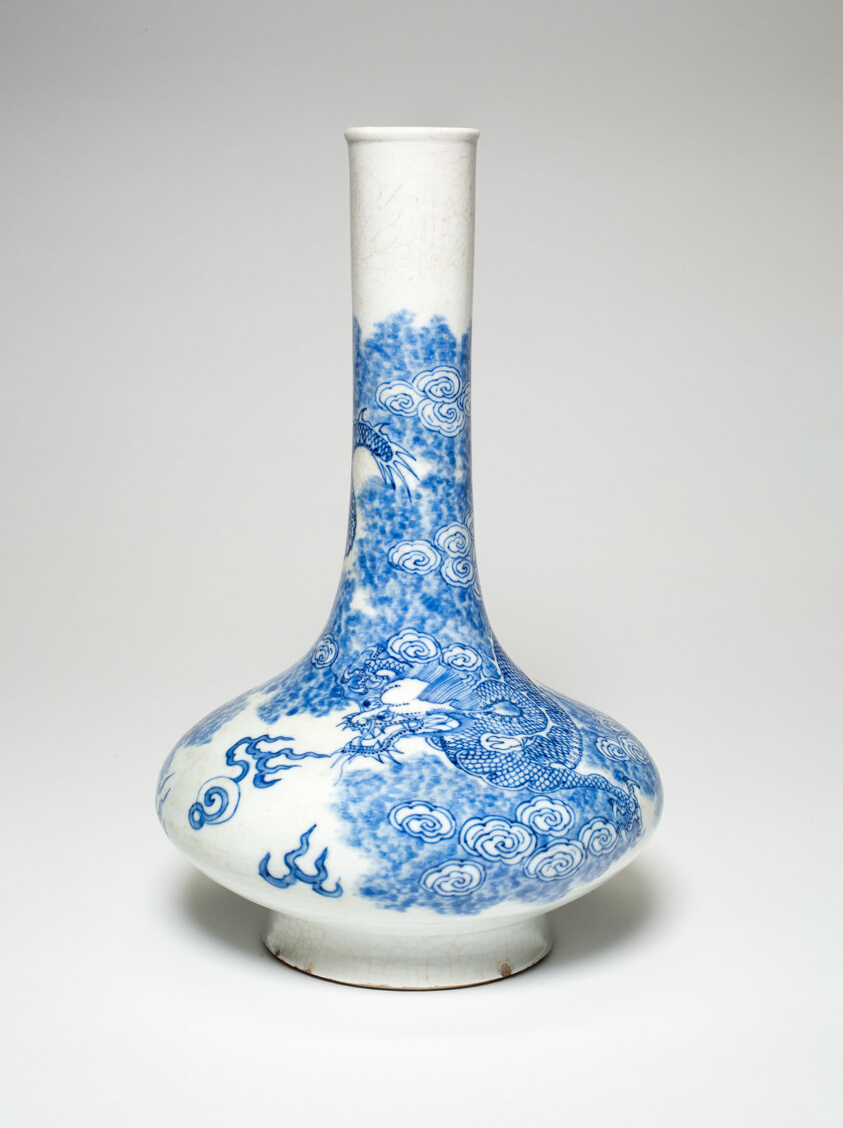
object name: Vessel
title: Bottle-Shaped Vase with Dragons among Clouds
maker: China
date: Qing dynasty (1644–1911), Kangxi period (1662–1722)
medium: Porcelain painted in underglaze blue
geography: China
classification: porcelain; asian art; ceramics